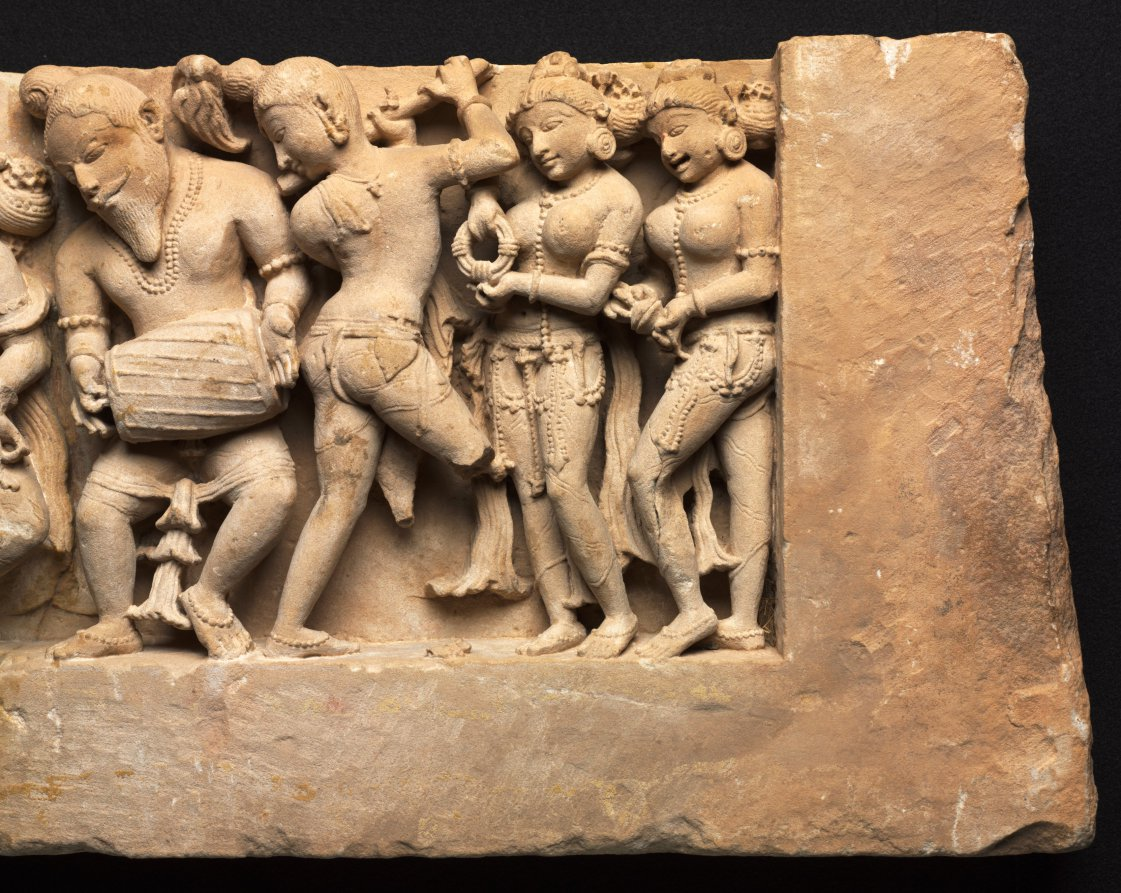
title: Frieze with Dancer and Musicians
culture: Northwestern India, Rajasthan, Sikar, Harshagiri, 10th century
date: c. 973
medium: sandstone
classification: Sculpture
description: A dancer, who strikes a pose in the center, is accompanied by a full orchestra of musicians in lively variegated poses. At the far left, a woman plays the cymbals, her mouth open in song. Twisting turning postures of figures wrought in high relief with little background space behind them are characteristics of Indian sculpture from the medieval period. Music and dance were important components of devotional temple activities; they were considered as pleasing to the divinity and attractive for devotees as the works of sculpture and architecture.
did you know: The twisting, dynamic postures of the musicians in this frieze may visually echo the joyful music they are playing together.